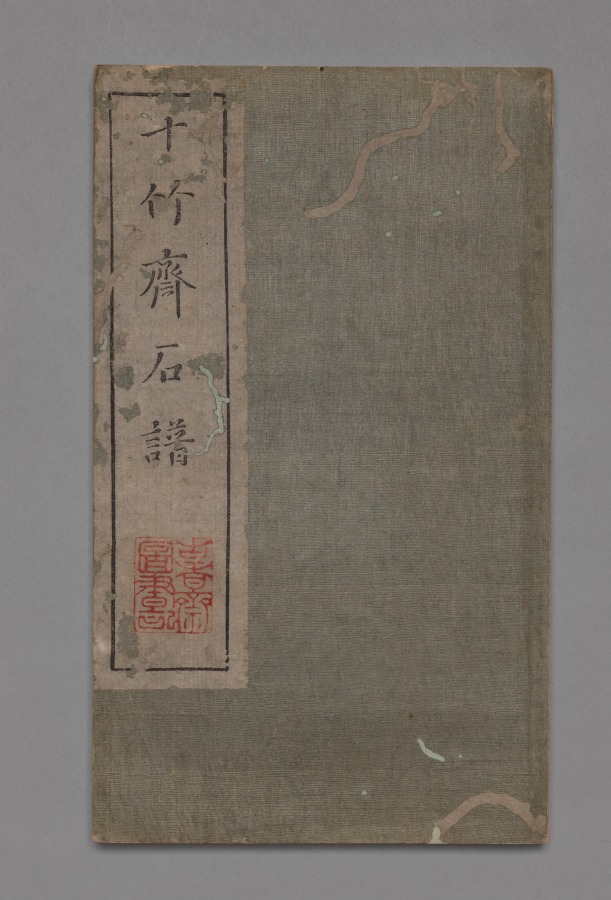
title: Ten Bamboo Studio Painting and Calligraphy Handbook (Shizhuzhai shuhua pu): Rocks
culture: China, Qing dynasty (1644-1911)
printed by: Hu Zhengyan (Chinese, c. 1584–1674)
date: 1633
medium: Woodblock-printed book; ink and colors on paper; first edition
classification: Print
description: Color printing reached a level of perfection in the early 1600s, as seen in this Ten Bamboo Studio Collection of Calligraphy and Painting and the Mustard Seed Garden Manual of Painting (printed 1679 and 1701). The painterly quality, precision in registering (aligning) the woodblocks, and harmonious colors made them the most successful color print editions in Chinese history. Both editions were printed and compiled in Nanjing, spread nationwide, and had a great impact on the arts in Japan and Korea.